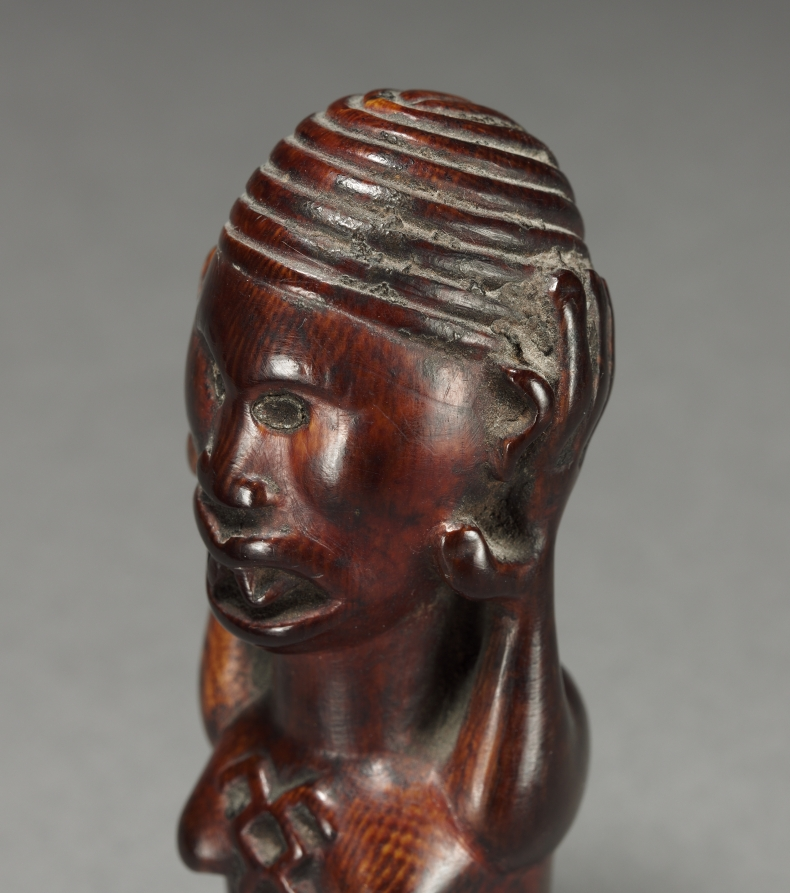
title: Female Figurine or Finial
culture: Central Africa, Democratic Republic of the Congo (most likely), Cabinda, or Republic of the Congo, Kongo people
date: late 1800s-early 1900s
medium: Ivory and iron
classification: Sculpture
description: This ivory figurine most likely served as the finial of a wooden staff or scepter, and owned and used by a high-ranking official or a ritual specialist. The combination of its features is quite unusual. The kneeling attitude is rather common and typically denotes respect. However, the position of the hands is anatomically incorrect with the thumbs toward the face. The idea of the striking hand gesture may refer to mourning.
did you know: The oversized hands with elongated fingers are positioned in an anatomically incorrect manner with the thumbs toward the face.